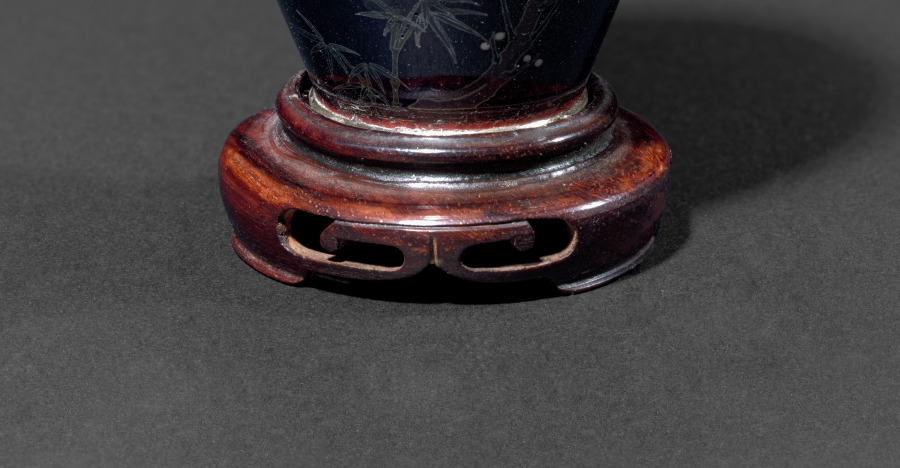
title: Vase (base)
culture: Japan, Meiji period (1868–1912) or Taishō period (1912–26)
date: early 1900s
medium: wood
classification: Enamel